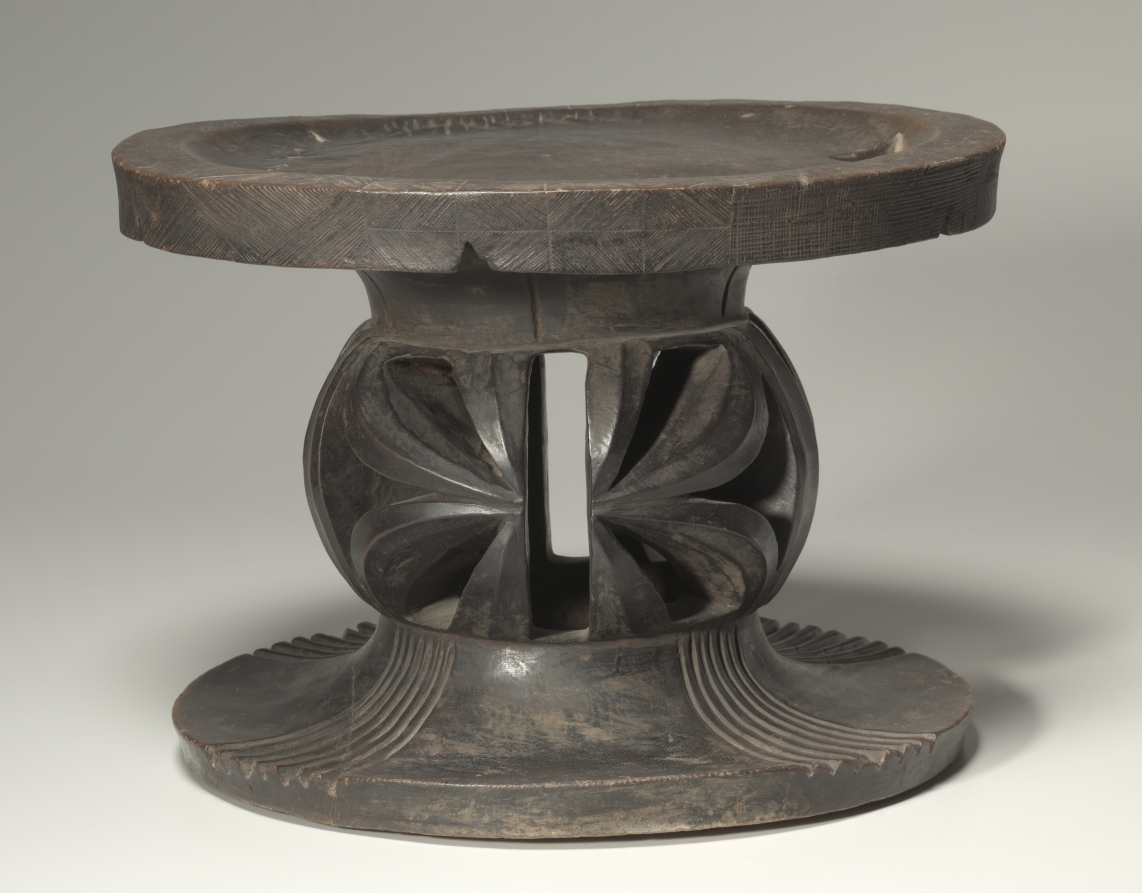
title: Stool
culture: Africa, Central Africa, Democratic Republic of the Congo, Mangbetu-style maker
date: by 1928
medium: wood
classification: Furniture and woodwork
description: Such stools were highly prized by their female owners. Sculpted by master artists with widespread reputations, they were often "signed" with a deeply cut mark on the base. This groove was then filled with red camwood as an expression of blessings and good wishes for the stool's owner.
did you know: In 1928, Paul Travis photographed the Mangbetu queen who once owned this stool as she sat on it.